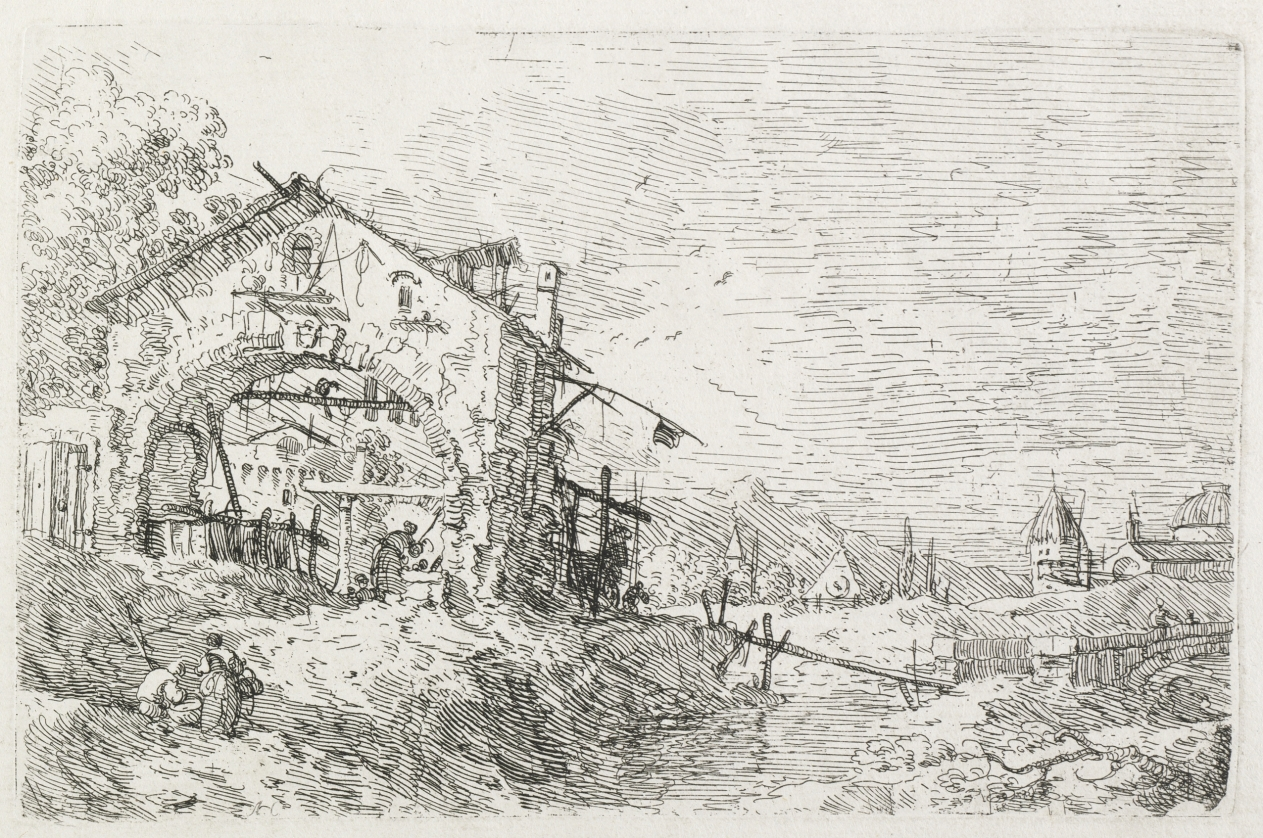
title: Views: A Woman Drawing Water under an Arch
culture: Italy, Venice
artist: Antonio Canaletto (Italian, 1697–1768)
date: 1735–1746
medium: etching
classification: Print